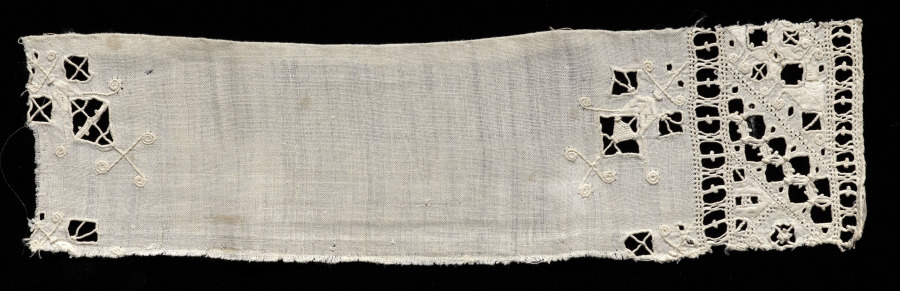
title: Lace Fragment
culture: Italy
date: 1600s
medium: Linen: needle lace (cutwork)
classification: Lace